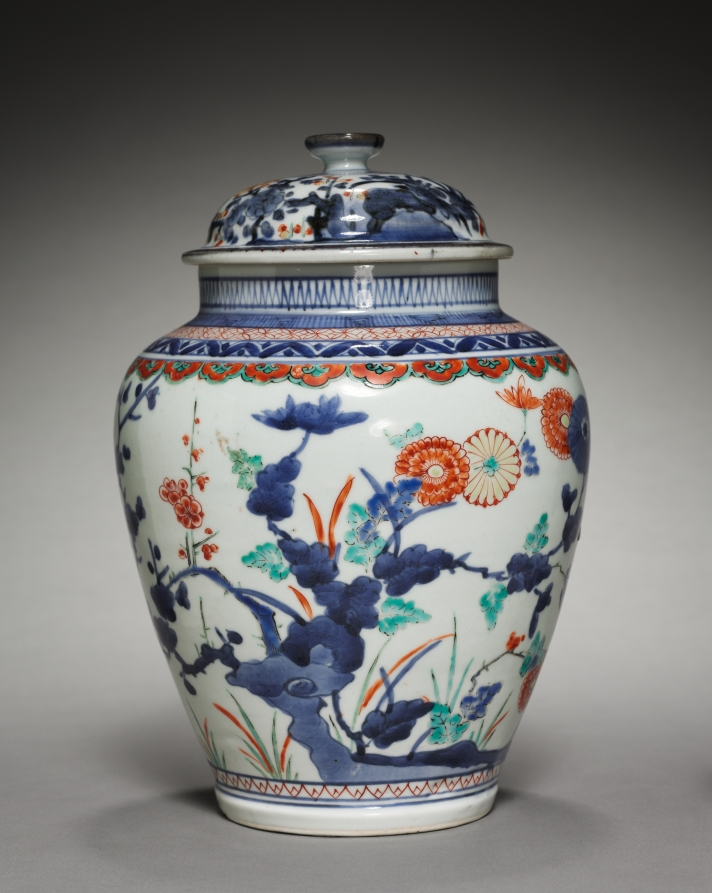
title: Covered Jar with Chrysanthemums, Peonies, and Plum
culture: Japan, Edo period (1615–1868)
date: late 1600s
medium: porcelain with underglaze blue and overglaze color enamel (Hizen ware, Kakiemon type)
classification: Ceramic